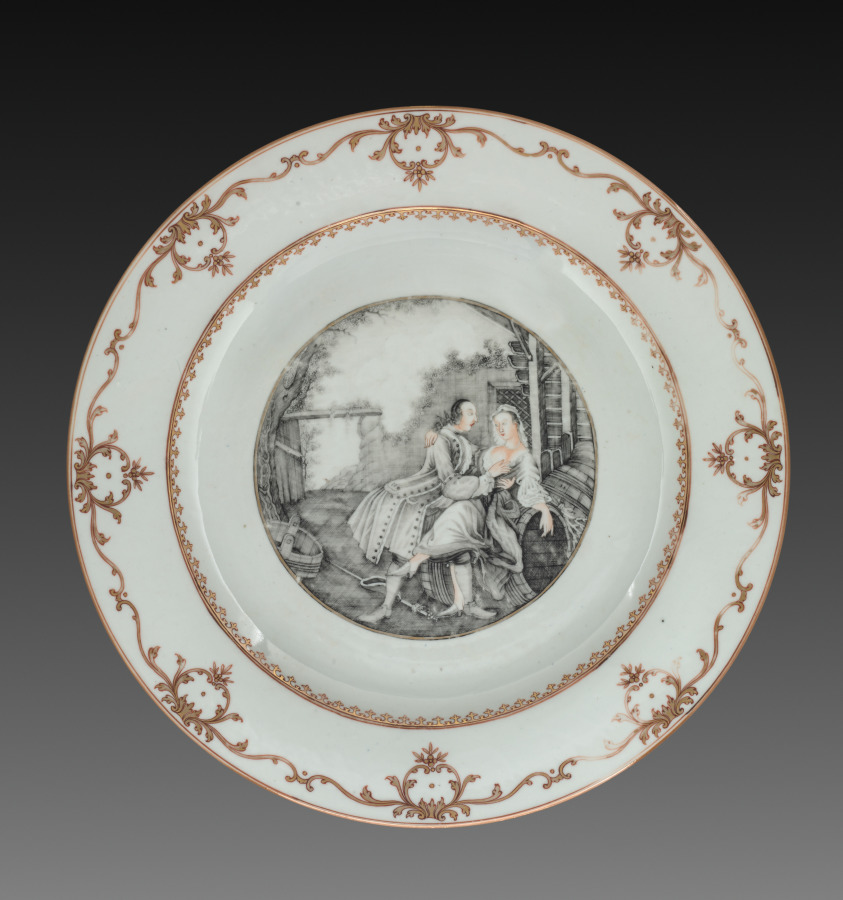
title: Charger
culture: China, Chinese Export, 18th century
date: c. 1750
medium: porcelain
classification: Ceramic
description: This plate demonstrates the commercial exchange of products—in this case prints and porcelain—between Europe and Asia in the 1700s. Here, a Chinese porcelain factory adapted a French print to decorate a dish for the European market. It depicts a fable by Jean de La Fontaine in which a barrel-maker’s wife dallies with a lover while her husband is working.